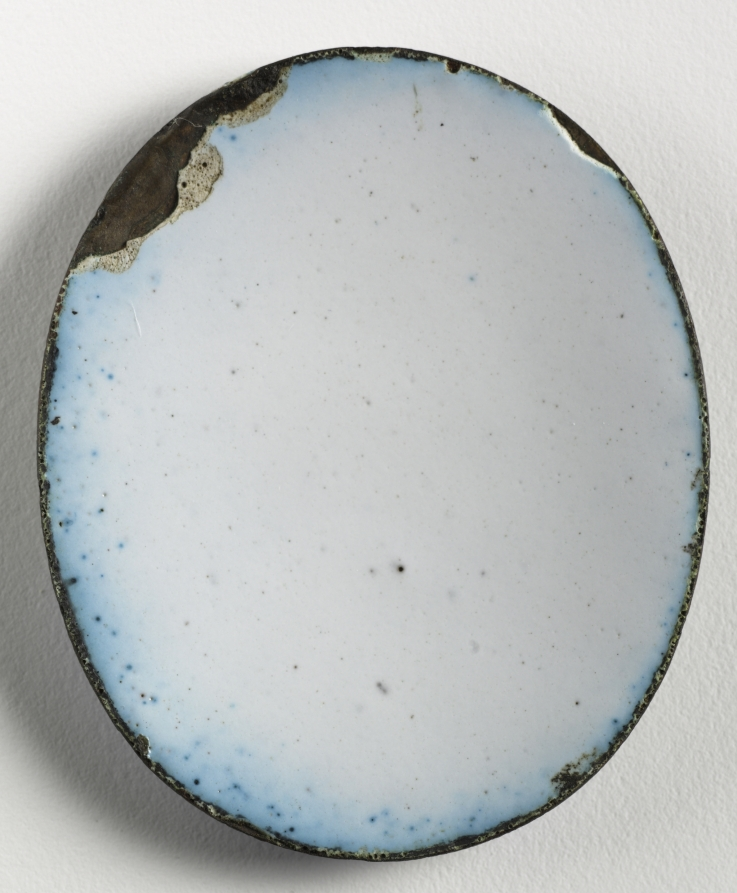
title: Portrait of a Man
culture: England, 18th century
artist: Christian Friedrich Zincke (German, 1683/85–1767)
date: c. 1735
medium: enamel on copper in a gold frame with a blue glass and hair reverse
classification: Portrait Miniature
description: The unknown sitter's shoulders are turned to the right, and he is painted almost full face. He wears a bright blue velvet coat with covered buttons, deep yellow embroidered waistcoat, and white stock collar with double lace frill down the front. His powdered wig falls to his shoulders. He has gray eyes and is clean shaven with rosy cheeks, and the background is dark brown. The miniature is set in a gold locket-style frame. The back displays a lock of dark brown hair inside a border of bright blue foiled glass—a popular framing style for miniatures in the late eighteenth and early nineteenth centuries and, therefore, surely a later addition. Since the publication of the Greene collection catalogue in 1951, the attribution of this miniature has been disputed, with experts alternately suggesting Christian Friedrich Zincke and possibly Charles Boit (1663–1727). The evidence in favor of Zincke, however, is far stronger than it is for Boit, who had not worked in England for over a decade before his death in 1727, several years before the most plausible date for this portrait. Among Zincke’s hallmarks are lips painted two different colors—here, purplish pink on top and orange on the bottom—a practice that became increasingly pronounced later in his career. This portrait also exhibits Zincke’s characteristic treatment of the eyes during this period: he framed the eyes with individually painted black dots to represent eyelashes. The counter-enamel is not inscribed but has the smooth appearance of the counter-enamels customarily associated with Zincke’s later career. A miniature identical in all but the facial features appeared at Christie’s, London, in 2004. Zincke often used this costume consisting of a blue (or sometimes brown) velvet jacket with covered buttons, yellow embroidered waistcoat, and frilled lace cravat. An example that sold at Christie’s in 1996 is signed and dated 1734. Another closely related and unsigned example by Zincke in the Metropolitan Museum of Art has been dated to c. 1745, indicating when this attire was frequently employed by Zincke’s studio.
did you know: Unlike fragile portrait miniatures painted in watercolor on vellum or ivory, which are prone to cracking, fading, and flaking, enamels are resilient, impervious to the effects of light, and retain their striking original colors over time.